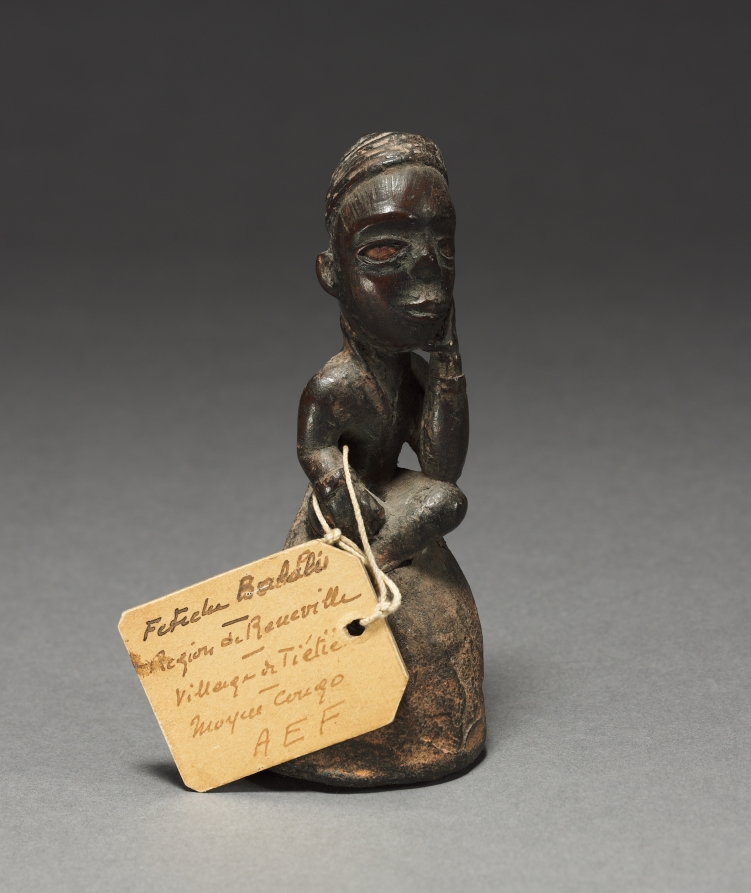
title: Power figure (nkisi)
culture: Africa, Central Africa, Republic of the Congo, Kongo-style maker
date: late 1800s-early 1900s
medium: Wood, organic materials (including resin), cloth, glass, and various other materials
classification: Sculpture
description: One of seven anthropomorphic figurines, these minkisi contained medicines in which an ancestral spirit was believed to reside. The medicines served a metaphorical rather than literal purpose in the resolution of conflicts among Kongo people. This asymmetrical figure wears a mpu headdress of chiefs with its characteristic geometric decoration. The pose may refer to a state of mourning.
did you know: Different from other Minkisi who hold their power in their abdomen, this figure sits atop a sphere in which the active substances still reside.